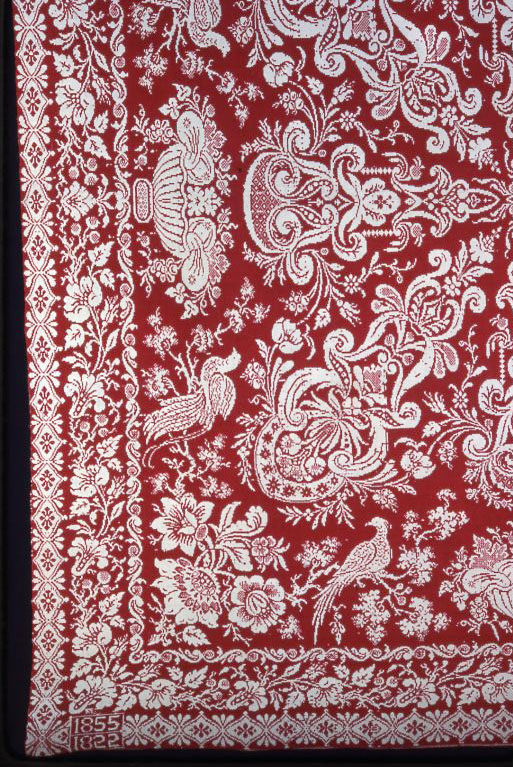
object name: Textile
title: Coverlet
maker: United States, New York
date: 1855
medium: Cotton and wool, plain weave double cloth; woven on loom with Jacquard attachment; full loom width; seamless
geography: New York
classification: textile; coverlet; weaving - coverlet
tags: coverlet